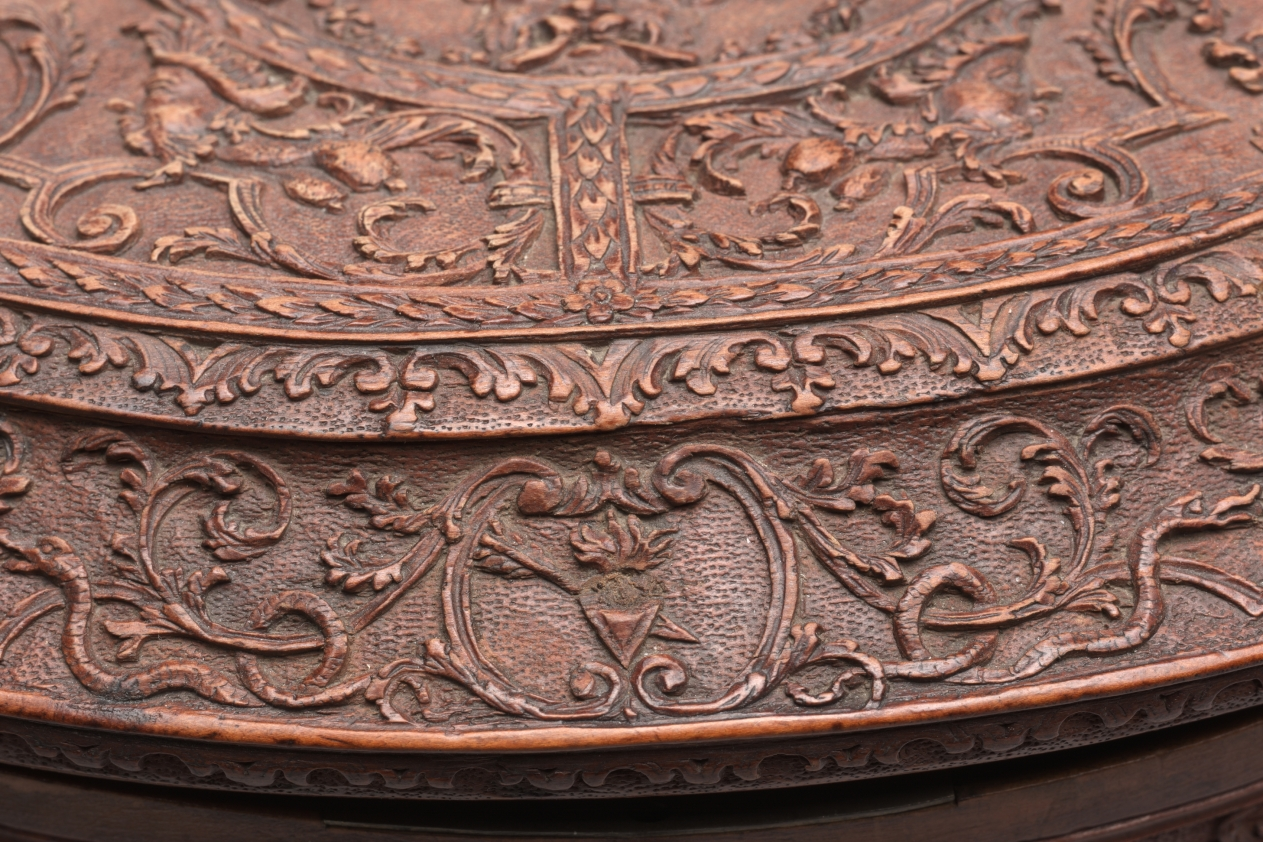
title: Box (2 of 2)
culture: France, Nancy, early 18th century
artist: Bagard (French)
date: early 1700s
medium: wood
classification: Furniture and woodwork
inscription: on top of lid, initials crowned by coronet